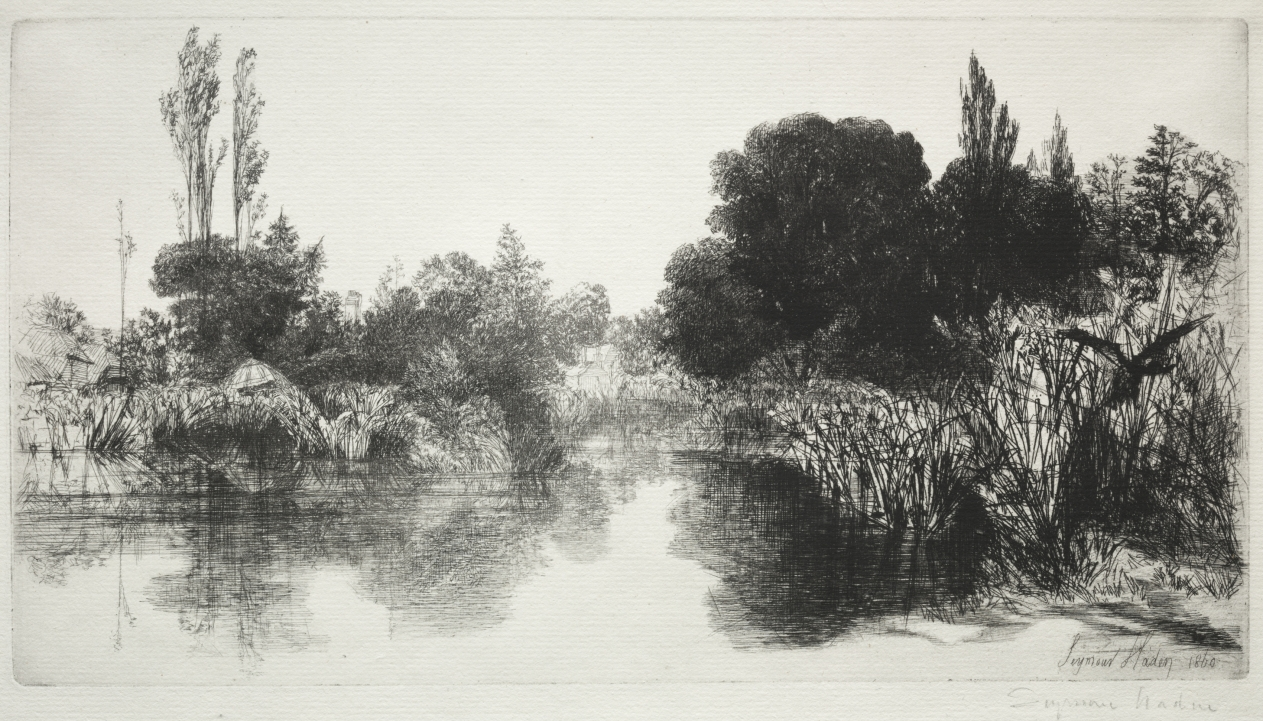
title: Shere Mill Pond, No. 11 (The Large Plate)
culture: England, 19th century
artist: Francis Seymour Haden (British, 1818–1910)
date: 1860 and later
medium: etching and drypoint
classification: Print